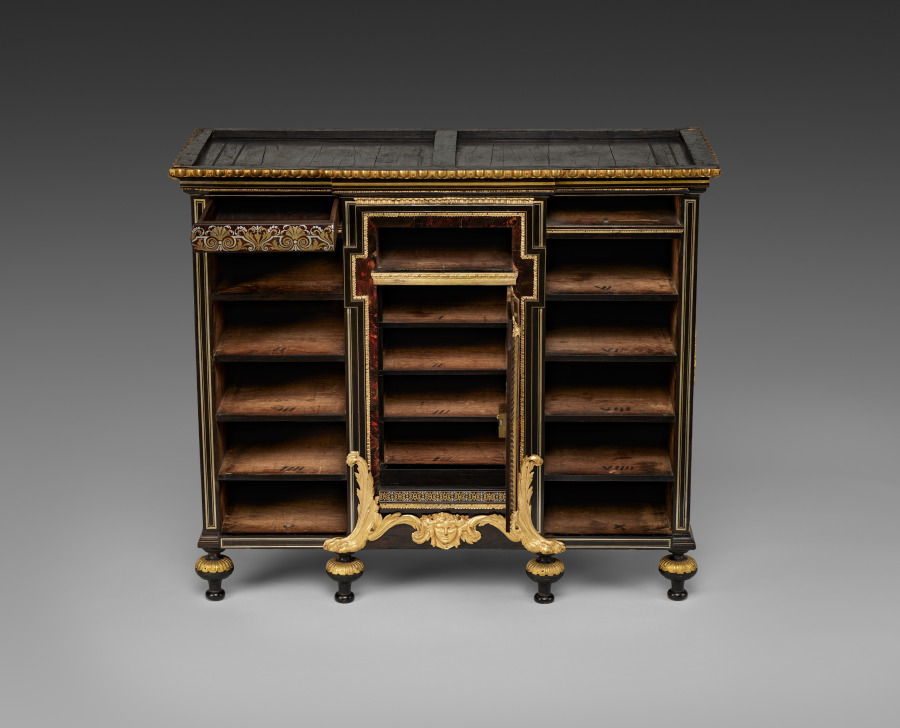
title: Cabinet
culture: France, late 17th Century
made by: André-Charles Boulle (French, 1642–1732)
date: c. 1690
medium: ebony, marquetry in metal and tortoiseshell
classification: Furniture and woodwork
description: Appointed cabinetmaker to King Louis XIV in 1672, André-Charles Boulle became a master of furniture making in France during the late 1600s until his death in 1732. Known primarily for his use of marquetry, in which metal patterns are inlaid into tortoiseshell then applied within the veneered surface of the furniture, Boulle established a level of quality and craftsmanship few others could achieve. As a result, his work found favor at the royal court and among other aristocrats and diplomats eager to impress the king. The inclusion of a medallion depicting Louis XIV within the bronze decoration of this chest would have identified the owner with the royal court. Often exhibiting stout architectural proportions with elegant groups of inlaid motifs such as the parrot on the central panel of this chest, Boulle’s designs are an example of the intellectual fashion for contrasting ideas, materials, and motifs.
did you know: Originally designed to sit atop an elaborate tall stand, this chest was likely altered in the late 1700s to reduce its scale and height.